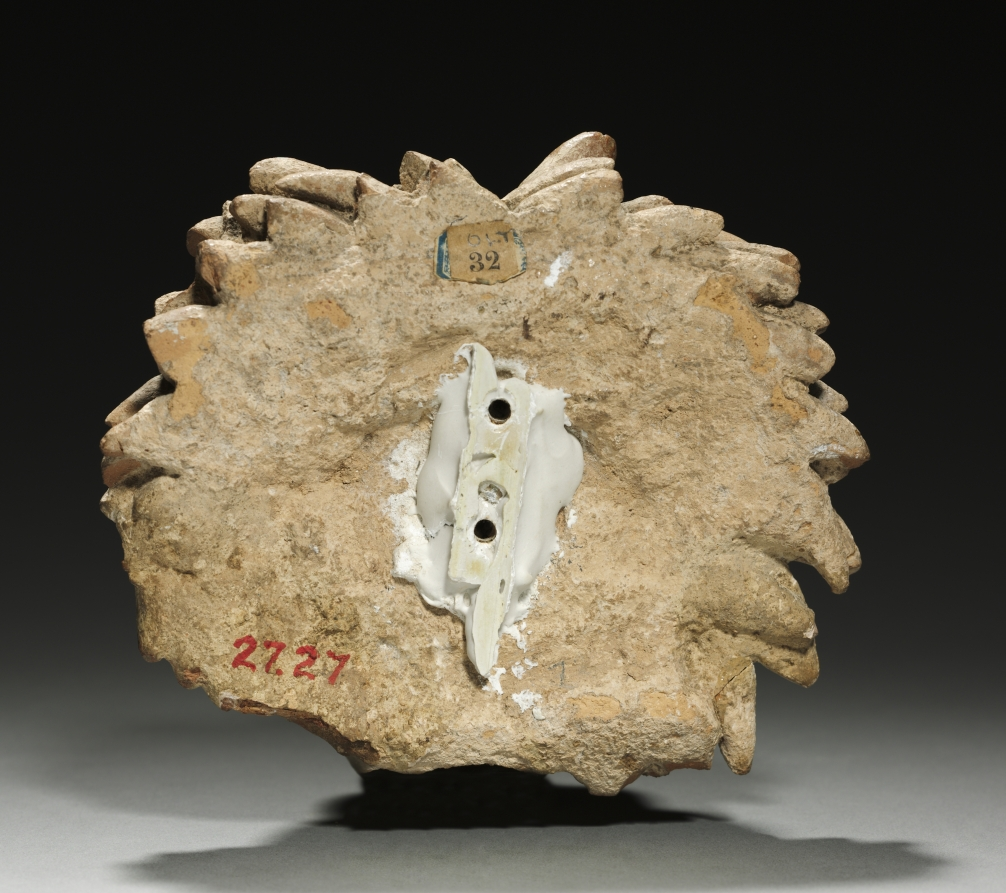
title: Lion's Head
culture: Greece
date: 500–400 BCE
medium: terracotta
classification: Sculpture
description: This terracotta sculpture is molded in the shape of a lion’s head. The lion opens its mouth and lolls out its tongue, showing off large upper and lower incisors (broken on one side). A mane spreads out around the lion’s head, framing the face. Lion heads like this one often served as architectural decoration.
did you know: Lions once roamed the lands around ancient Greece but were probably extinct in the region by the 2nd century BCE.